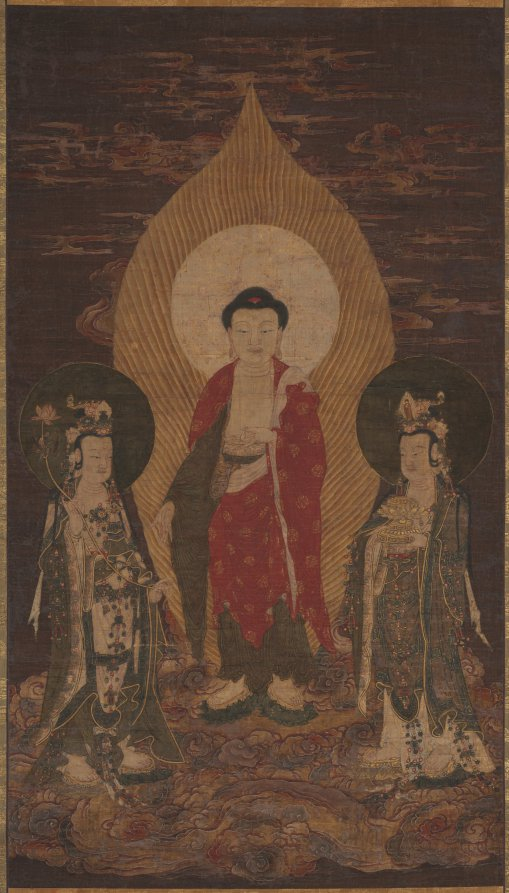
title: Amitābha Triad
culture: China, Ming dynasty (1368–1644)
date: possibly 1400s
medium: Hanging scroll; ink and color on silk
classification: Painting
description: This hanging scroll illustrates an apparition of Buddha Amitābha (阿彌陀 in Chinese) and two attendant bodhisattvas, in the midst of colorful light and swirling clouds. The one who carries a miniature image of Amitābha in its jeweled crown is Avalokiteśvara (觀音 in Chinese); the other who carries a flower vase is Mahāsthāmaprāpta (大勢至 in Chinese). Previously, this work was identified as a rare example of a Korean Buddhist painting from the early Joseon period. In contrast to surviving Korean works from this time the scroll stands out for its fine details. However, other elements such as the striped almond-shaped halo that encircles the main Buddha, firm red lines that define each deity’s facial features, and the flowing garments may identify it as an early Ming period Chinese Buddhist painting.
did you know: Amita is flanked by a pair of bodhisattvas, compassionate beings who aid others to reach enlightenment.